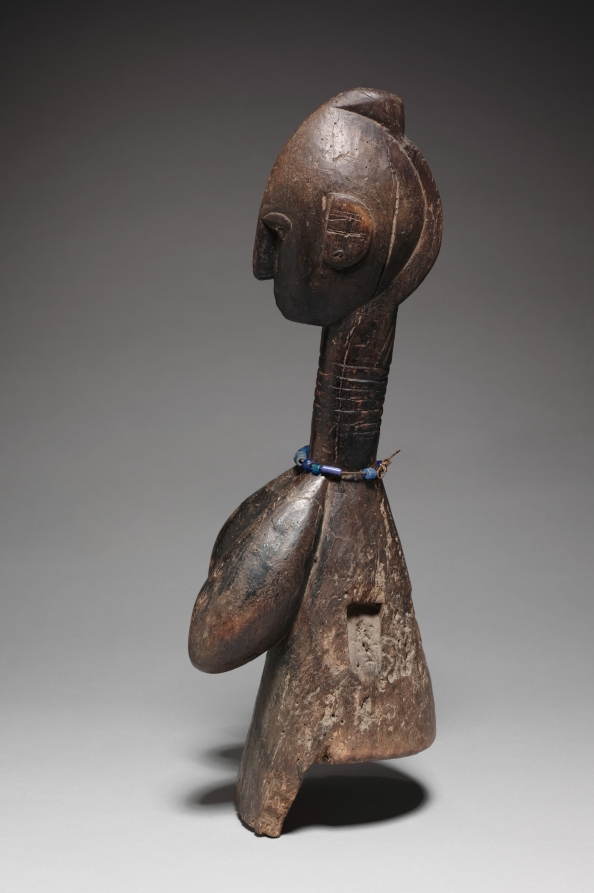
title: Headdress (Zigiren-Wɔndɛ)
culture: Africa, West Africa, Guinea, Baga-style carver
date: early to mid-1900s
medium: Wood, glass beads, upholstery studs, and natural fiber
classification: Mask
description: Owned and used for entertainment by young unmarried men only among some Baga subgroups, this type of headdress is said to represent the Maiden, a beautiful young woman. With a beaded necklace and eyes embellished with furniture tacks, the headdress was attached to a cone-shaped costume consisting of colorful cloths and raffia and constructed over a bamboo armature.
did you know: The performer of this mask grasped the projecting "legs" to steady it while balancing it on his head.